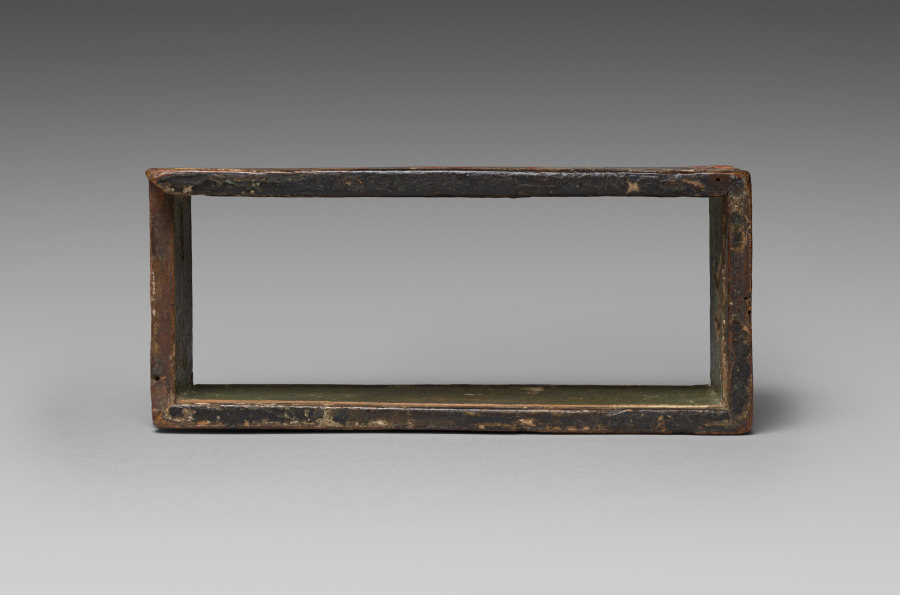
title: Reliquary Box with Scenes from the Life of John the Baptist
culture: Byzantium, Constantinople, late Byzantine period, 14th century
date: 1300s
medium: tempera and gold on wood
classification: Wood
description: John the Baptist--the first person to recognize Christ as the promised savior and the one who baptized him in the Jordan River--was one of the Byzantine Empire’s most revered saints. This box shows four scenes from the saint’s life: John’s martyrdom, Christ’s baptism, John’s birth, and the announcement of his birth to his parents. It probably once housed one of the saint’s relics; several were kept in churches and monasteries in Constantinople, including fragments of his skull and right arm and locks of his blood-clotted hair.